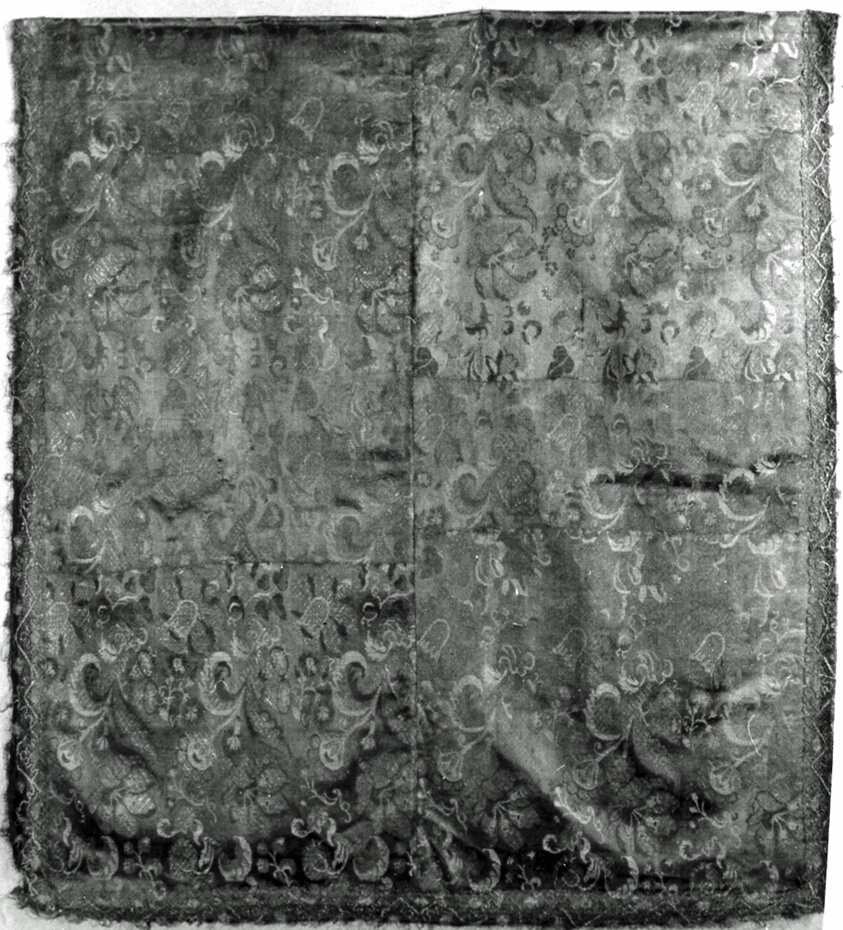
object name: Textile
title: Panel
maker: Italy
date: 17th century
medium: Brocaded fancy compound satin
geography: Italy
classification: textile; weaving